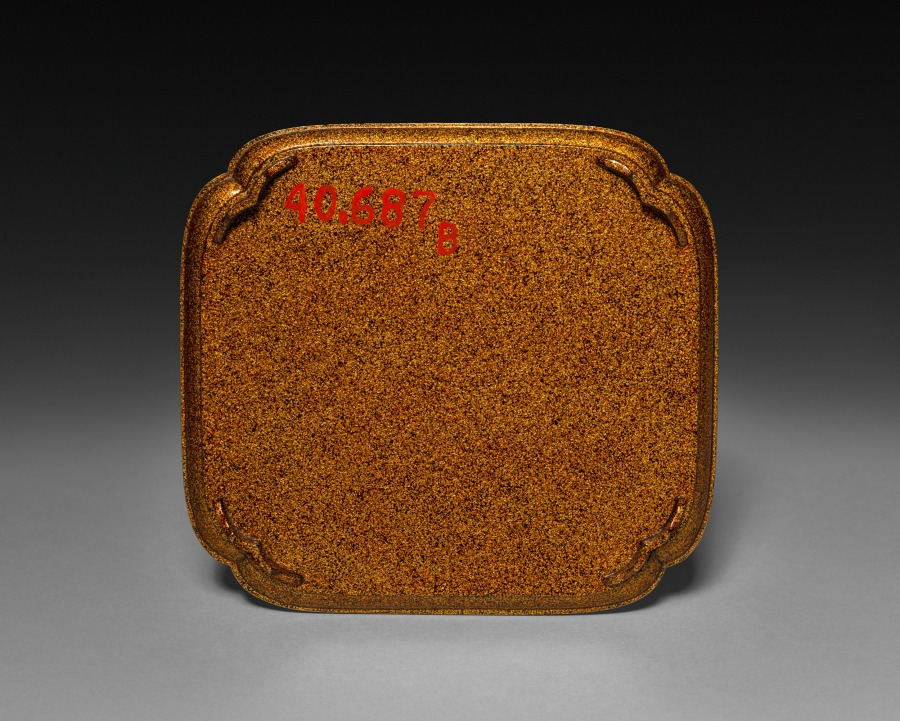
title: Tray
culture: Japan, Meiji period (1868–1912)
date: late 1800s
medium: wood with lacquer and gold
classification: Lacquer